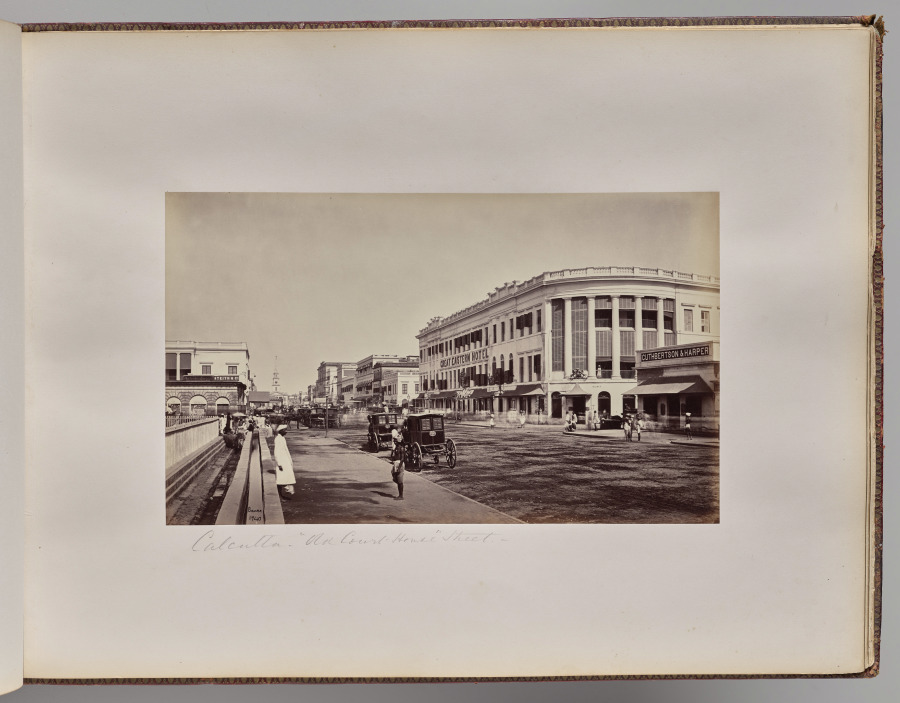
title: Calcutta. Old Court House Street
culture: England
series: Photographs of Northern India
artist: Samuel Bourne (British, 1834–1912)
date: 1863–70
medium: albumen print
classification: Photograph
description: The 50 images in this album, all taken in the 1860s, move from the hill towns of the Himalayas down to cities including Lahore (now in Pakistan), Delhi, Lucknow, Agra, Benares (now Varansi), and Calcutta (now Kolkata). Architectural studies of major monuments offer valuable historical records of what sites such as the Taj Mahal and the imperial mosque of the Mughal emperors in Delhi looked like before 20th-century restorations.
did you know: Samuel Bourne, the author of most the images in this album, was a banker in England before he moved to India to become a professional photographer.